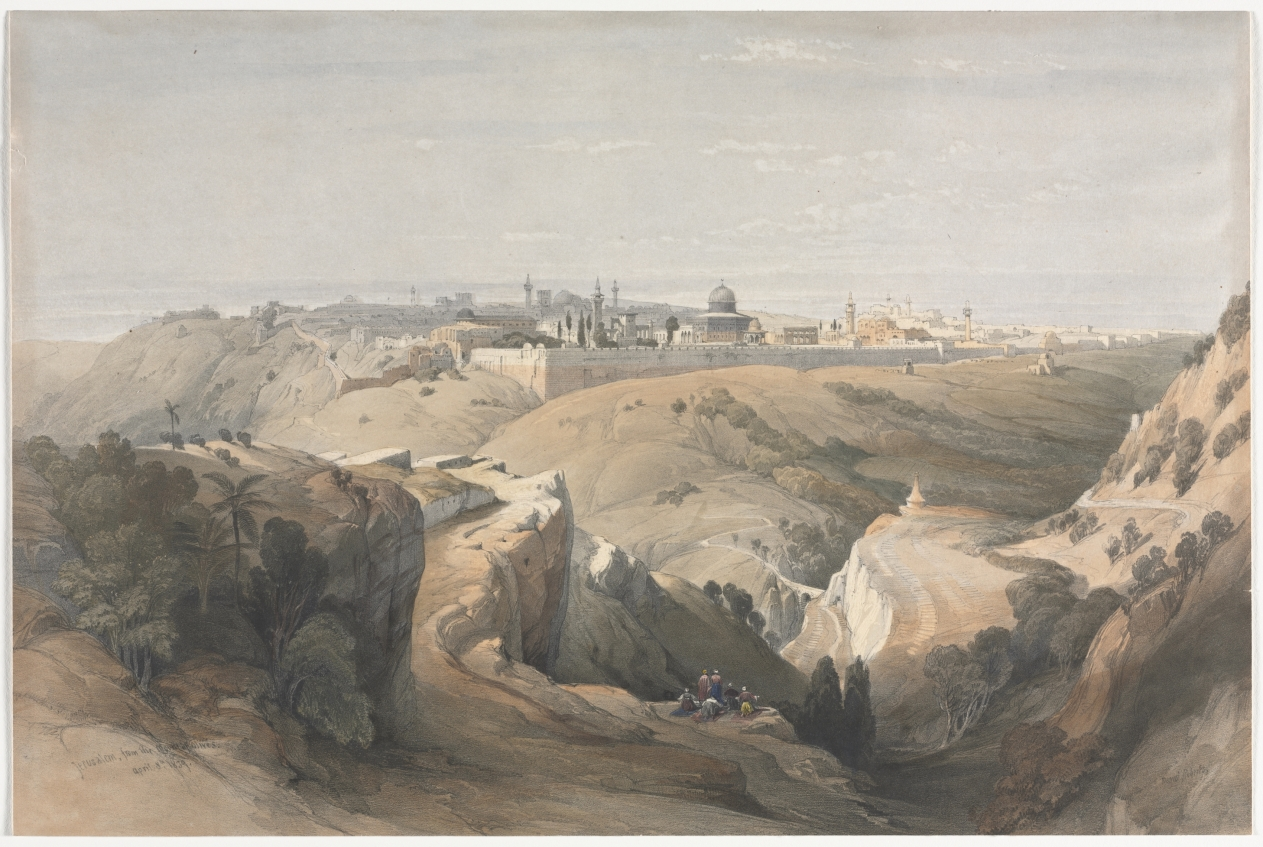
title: Jerusalem from the Mount of Olives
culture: England, 19th century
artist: David Roberts (Scottish, 1796–1864)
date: 1839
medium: color lithograph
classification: Print